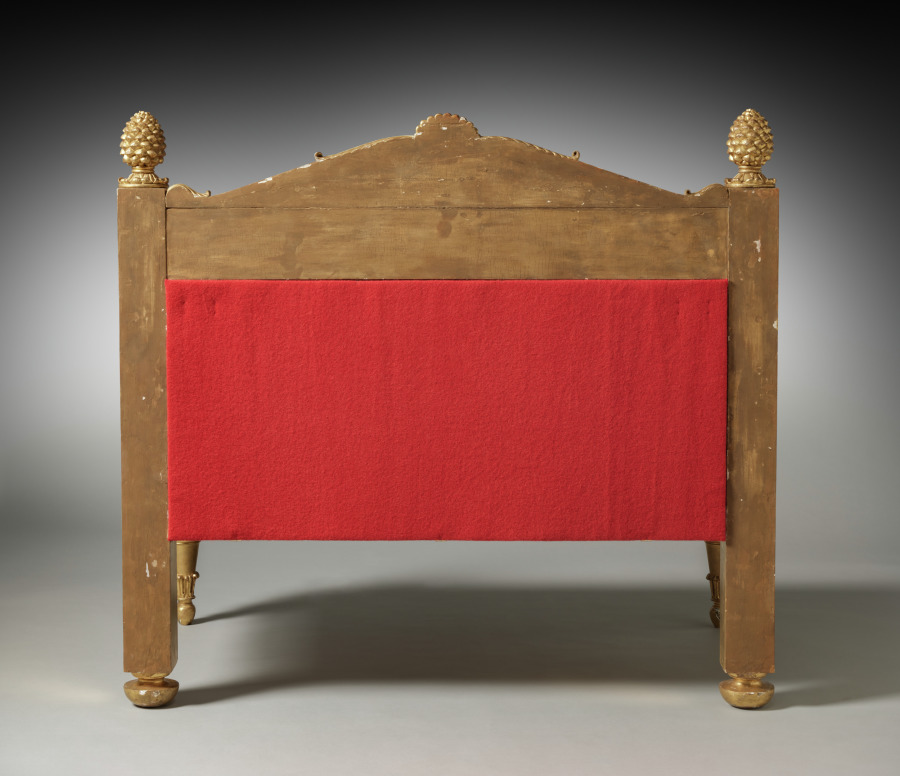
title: Settee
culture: England, 19th century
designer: Thomas Hope (British, 1769–1831)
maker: Unknown Maker (British)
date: c. 1802–07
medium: gilt-wood, reproduction wool upholstery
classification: Wood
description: An art collector, designer, and champion of neoclassicism, Thomas Hope designed this settee for display in his London house. Hope’s design exemplifies the continued interest in neoclassical ornament around 1800 through the use of elaborately carved friezes, a central pediment, and a lavishly gilded surface. In 1807 Hope published Household Furniture and Interior Decoration, featuring descriptions of his renowned collection of antiquities and the interior furnishings from his London house, including this settee. Many architects and cabinetmaking firms took inspiration from Hope’s designs, adapting Greek and Roman forms to create bold expressions of neoclassicism in their architecture and decoration.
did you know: The acorn finials, ram’s heads, and clusters of stylized honeysuckle flowers along the settee’s frame are typical of Thomas Hope’s neoclassical designs.